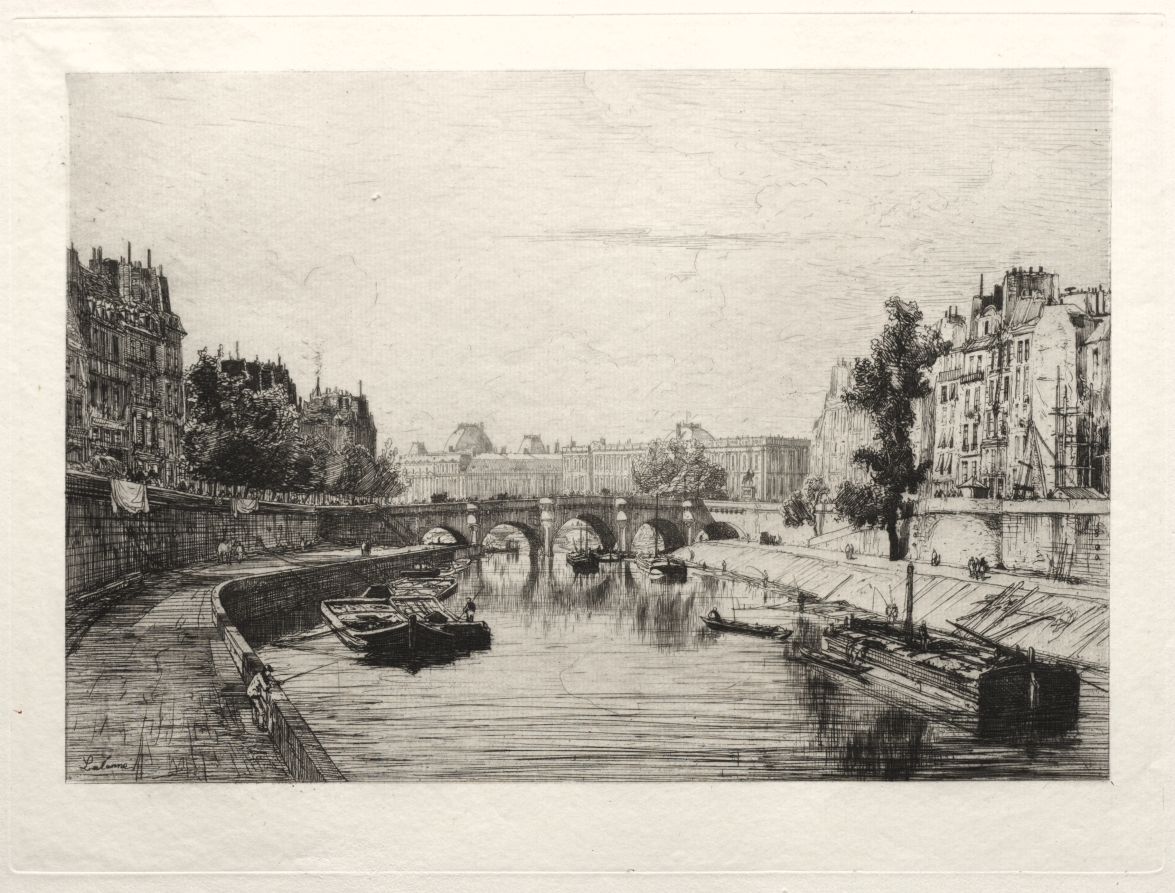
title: View from Pont St. Michel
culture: France, 19th century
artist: Maxime Lalanne (French, 1827–1886)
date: 1865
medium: etching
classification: Print